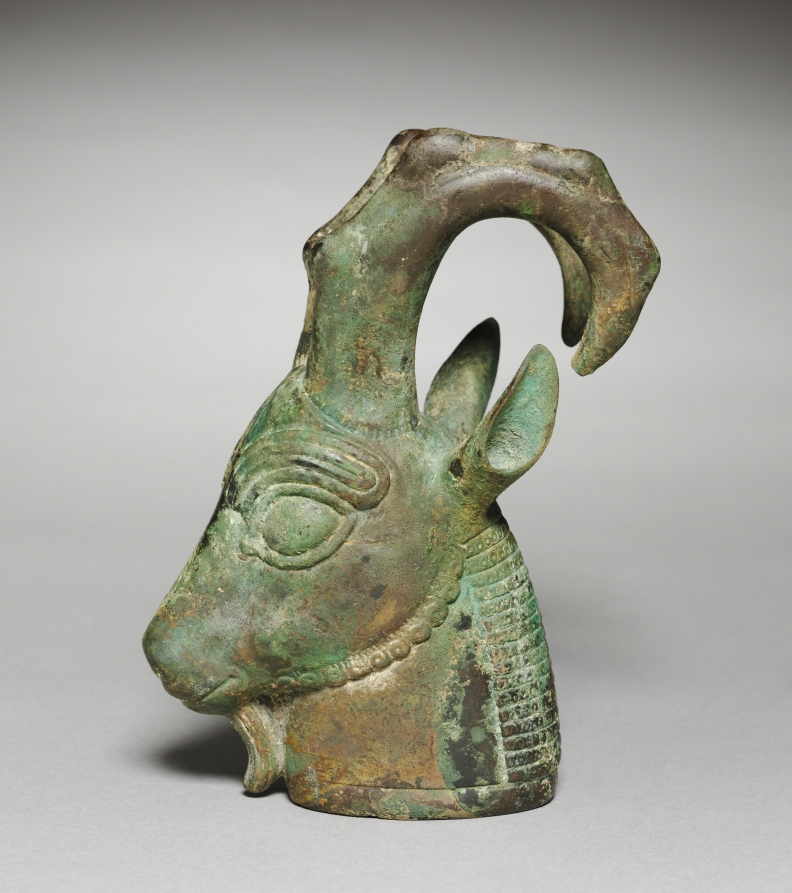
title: Ibex-Head Ornament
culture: Iran, Achaemenid (550–330 BCE)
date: c. 525–450 BCE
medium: bronze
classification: Sculpture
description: This may have decorated an ornate piece of furniture or a huge and heavily embellished bronze cauldron similar to that which the nearby bronze bull head once adorned.